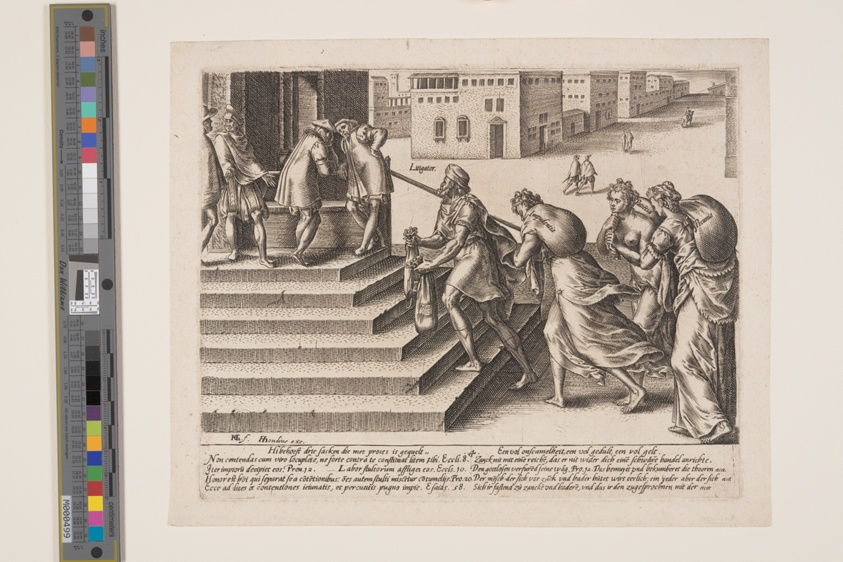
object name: Print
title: Unequal Justice, plate 4 from The Abuses of The Law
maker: Hendrick Goltzius (Dutch, 1558–1617)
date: c. 1580, published 1597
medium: Engraving on laid paper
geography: Netherlands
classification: engraving; paper; print; prints and drawing